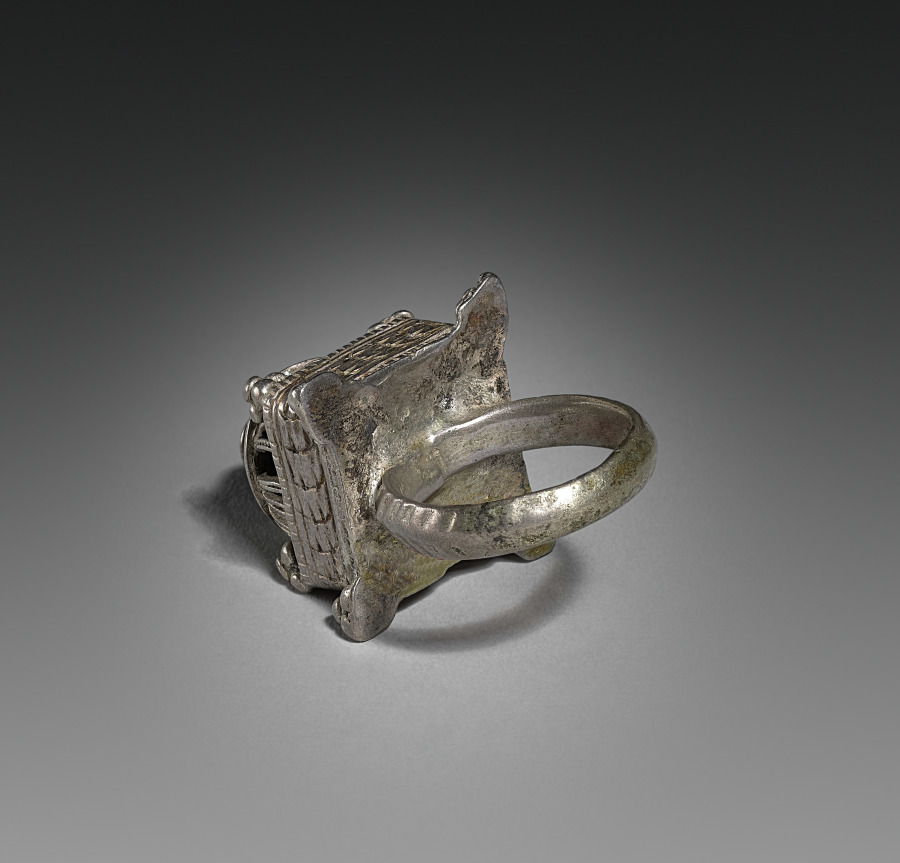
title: Ring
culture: Oman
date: early 1900s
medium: silver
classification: Jewelry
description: Silver finger-ringers were gifted or worn by both Omani men and women in a Zār ceremony to ward off evil.